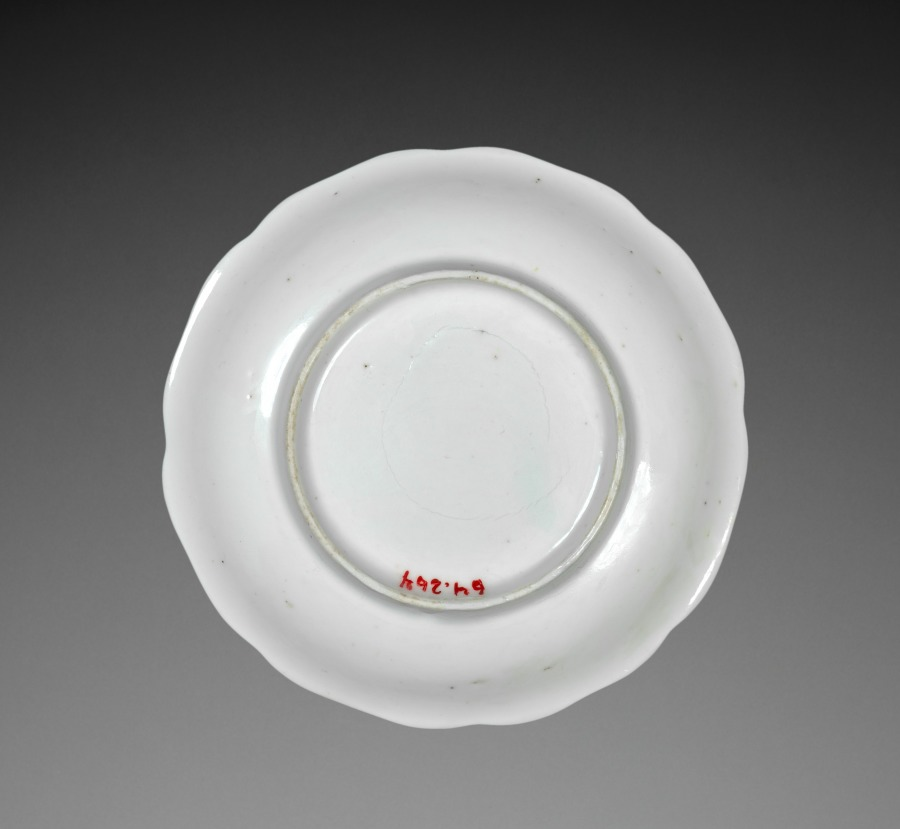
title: Dish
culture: Japan, Edo period (1615–1868)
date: 1700s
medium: porcelain with overglaze enamel decoration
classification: Ceramic